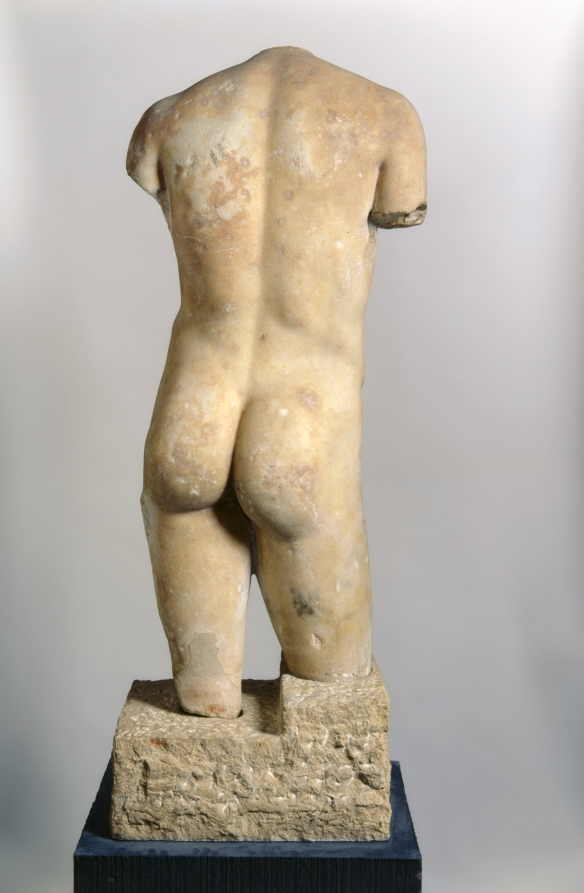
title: Torso of a Youth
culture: Greece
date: c. 150–100 BCE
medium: marble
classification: Sculpture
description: The exceptional workmanship suggests that this sculpture was carved by a Greek sculptor. Its incomplete state of preservation makes precise identification difficult, but it was most likely an Apollo or Dionysos, modeled in the soft, somewhat effeminate style of Praxiteles. The museum’s Apollo Sauroktonos is a useful parallel. The two drill holes in the upper chest are ancient and were possibly used to support separate long tresses of hair. The sculpture may well be a copy of a fourth-century original.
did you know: It was common practice in the 1700s and 1800s to attach new heads or limbs to fragmented ancient statues like this one.